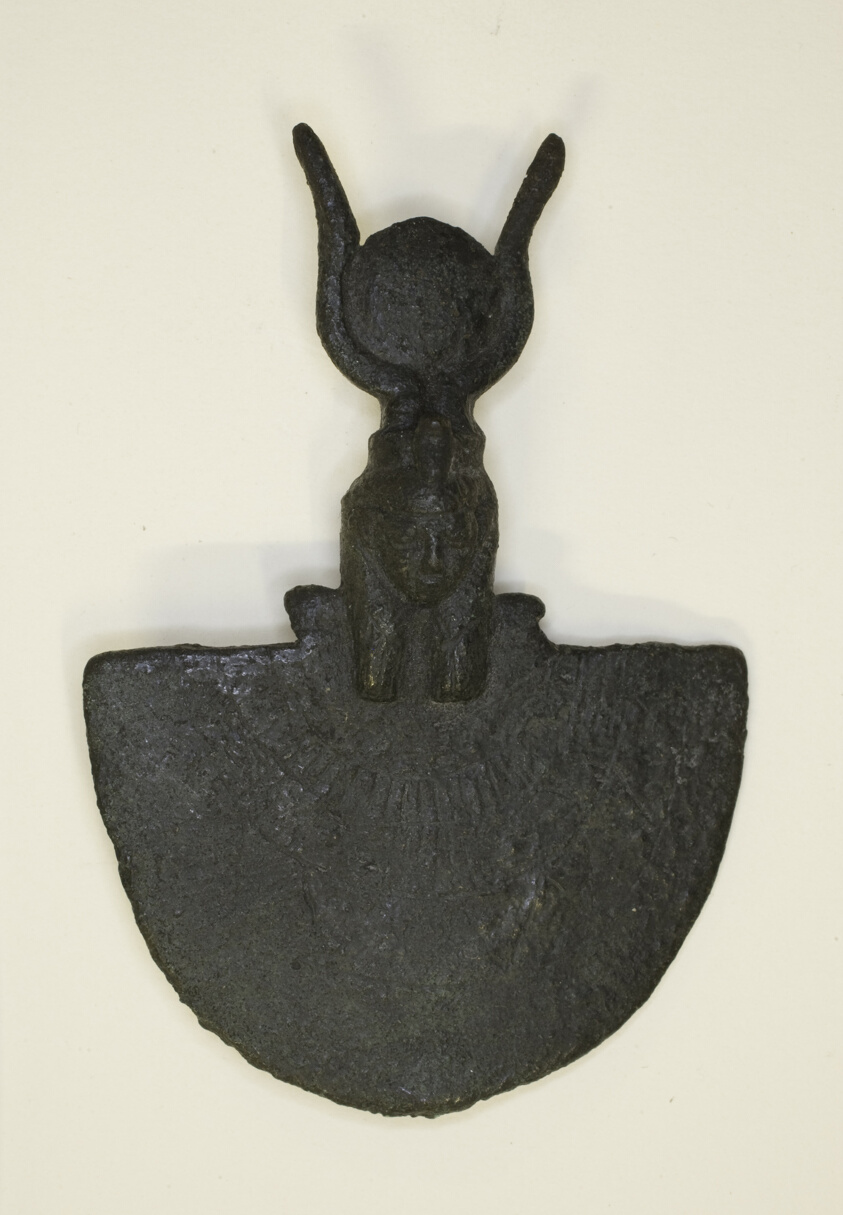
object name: Costume and Accessories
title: Amulet of an Aegis with the Head of Hathor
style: egyptian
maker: Egyptian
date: Third Intermediate Period–Late Period, Dynasties 21–31 (about 1069–332 BCE)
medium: Bronze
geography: Egypt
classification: amulet; jewelry; bronze; metal; ancient art; costume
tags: goddesses